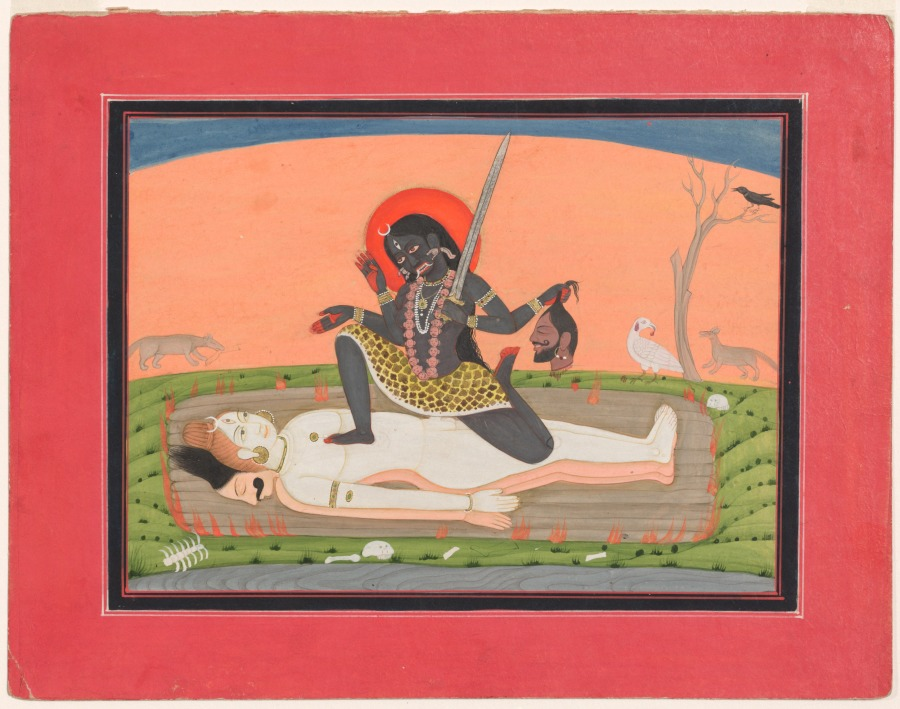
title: Kali on Shiva, from a Tantric Devi Series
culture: Northern India, Pahari kingdoms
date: c. 1810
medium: gum tempera and gold on paper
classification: Painting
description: The goddess Kali kneels in the posture reserved for wrathful deities ready for battle. In one hand she holds the sword she used to sever the demon head she triumphantly grasps in another hand. As the personification of divine energy—shakti in Sanskrit—Kali appears active, while the male principle, personified as her consort Shiva, is like a corpse (shava). The scene is set in a cremation ground, complete with vultures, jackals, and bones. Contemplation of paintings such as this assists followers in overcoming fear of death. In this image, the dead body is overlaid with the dual principles of the divine in Hindu thought: male and female, passive and active, matter and energy, white and black, Shiva and Shakti.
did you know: This Tantric Devi painting is from a series made in the Pahari Kingdom of Mandi. CMA also has another from the same series, 2020.431.